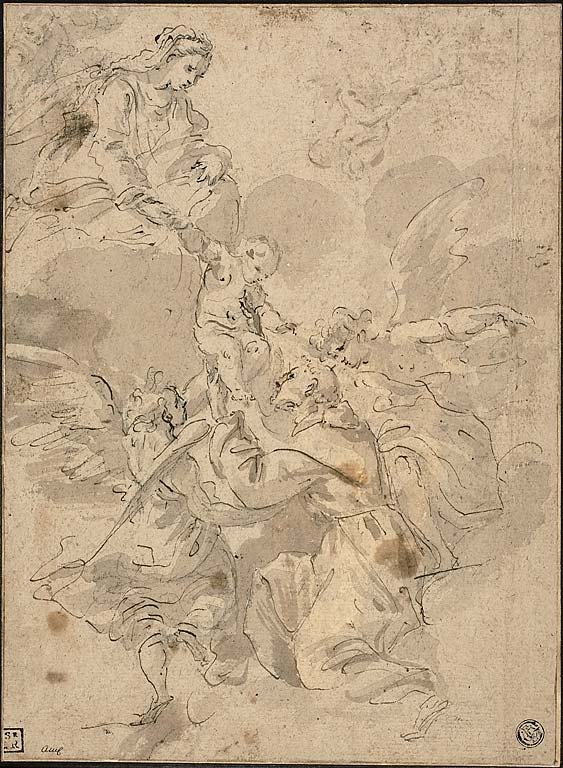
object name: Drawing and Watercolor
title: Saint Francis Adoring Virgin and Child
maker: Possibly Luigi Garzi (Italian, 1638-1721); or Giovanni Domenico Ferretti (Italian, 1692-1766); or Sisto Badalacchio (Italian, 1581-1647)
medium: Pen and brown ink, with brush and brown wash, over black chalk, on tan laid paper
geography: Italy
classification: pen and ink drawings; drawings (visual works); prints and drawing